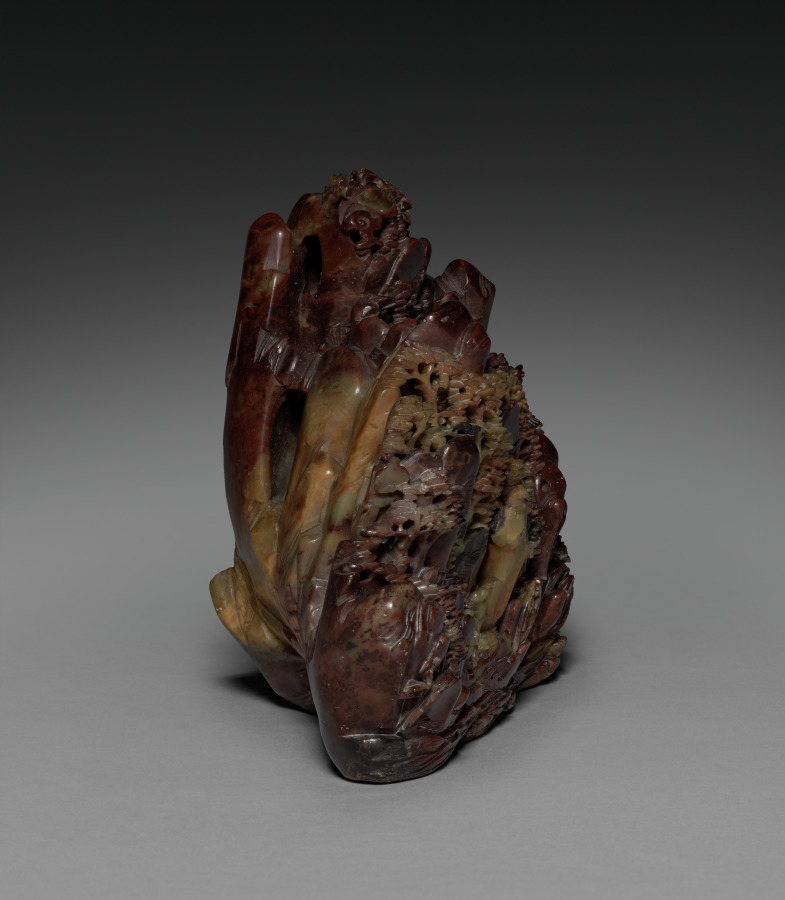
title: Landscape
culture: China, Qing dynasty (1644-1911)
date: 1644–1911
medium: soapstone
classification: Stone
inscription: 石門洞天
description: A mountain scenery surrounded by water and fish is meticulously carved out of soapstone, with a pond, bridge, waterfall, and temple front in its center. The unidentified figure scene on the left includes an ox and a man wearing what appears to be a Korean hat. A Buddha figure hidden in the depth of the temple can be glimpsed from the backside. The inscribed pillar on the right reads “Stonegate Cave to Heaven (shimen dongtian)”. Indentations all over the stone suggest that the miniature mountain was once adorned with precious stones and metal, presumably representing an earthly paradise to which one could escape in one’s mind and imagination.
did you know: A waterfall plummets down the cliff by the temple and then flows smoothly down to join the river at the front of the landscape scene.